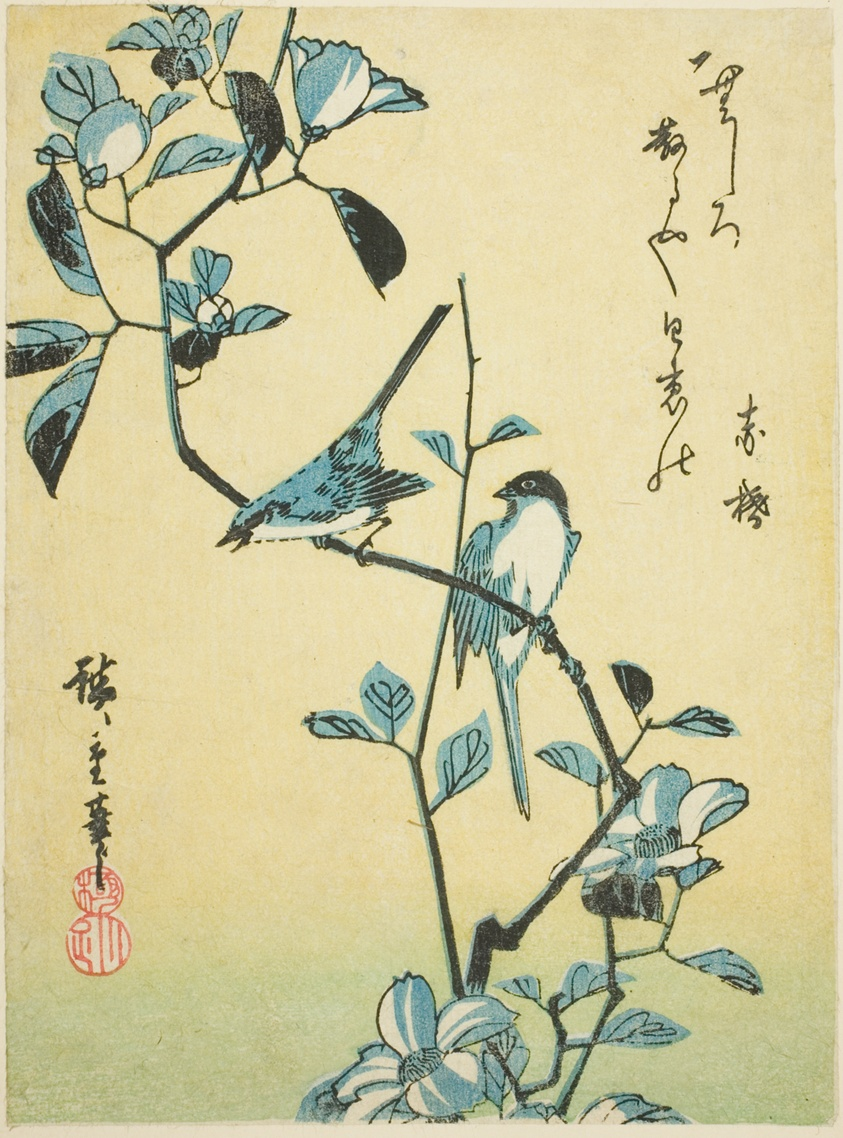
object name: Print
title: Birds on camellia branch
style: Japanese (culture or style)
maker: Utagawa Hiroshige 歌川 広重; Japanese, 1797-1858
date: 1830s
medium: Color woodblock print; chuban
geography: Japan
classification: woodblock print; print; asian art